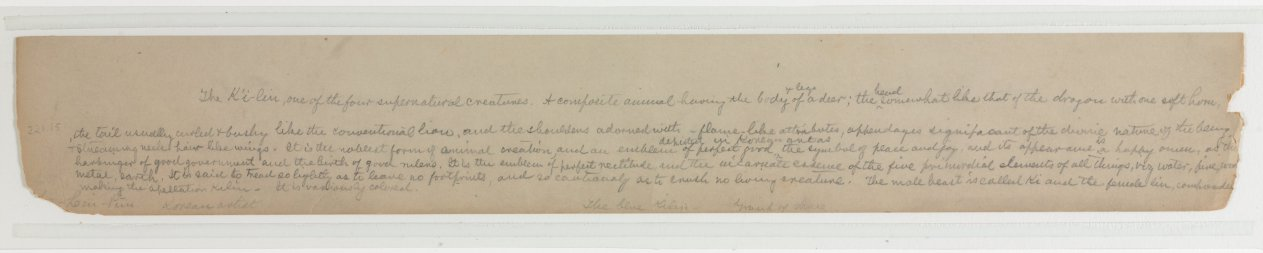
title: Daoist Immortal on a Qilin and Two Attendants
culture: Korea, Joseon dynasty (1392–1910)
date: late 1800s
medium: Ink and color on paper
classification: Painting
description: By the late 18th century, subjects that deal with Daoist immortals and their fantasy stories were increasingly chosen for paintings. For their wish-granting message, Daoist figure paintings such as this one were often commissioned to celebrate festive occasions. Judging from its dimension, this paining used to be part of either a small-size multi-panel folding screen or a large-size album that depicts a series of Daoist immortals and Buddhist deities.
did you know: As a fantastical animal hybrid of a griffin and a sphinx, the animal qilin was used as a symbol of heavenly blessings.